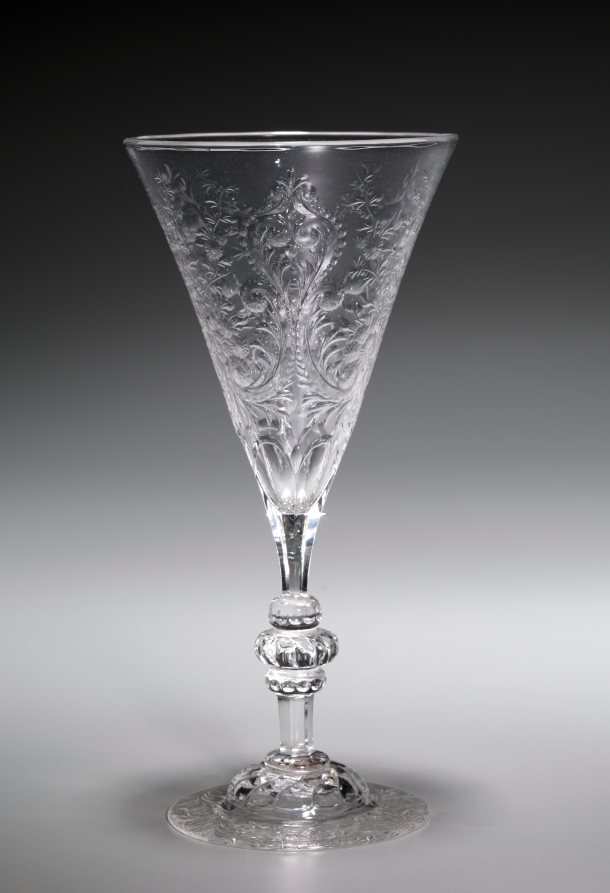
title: Glass from a Place Setting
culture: probably America, late 19th-early 20th century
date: c. 1890–1920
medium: glass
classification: Glass